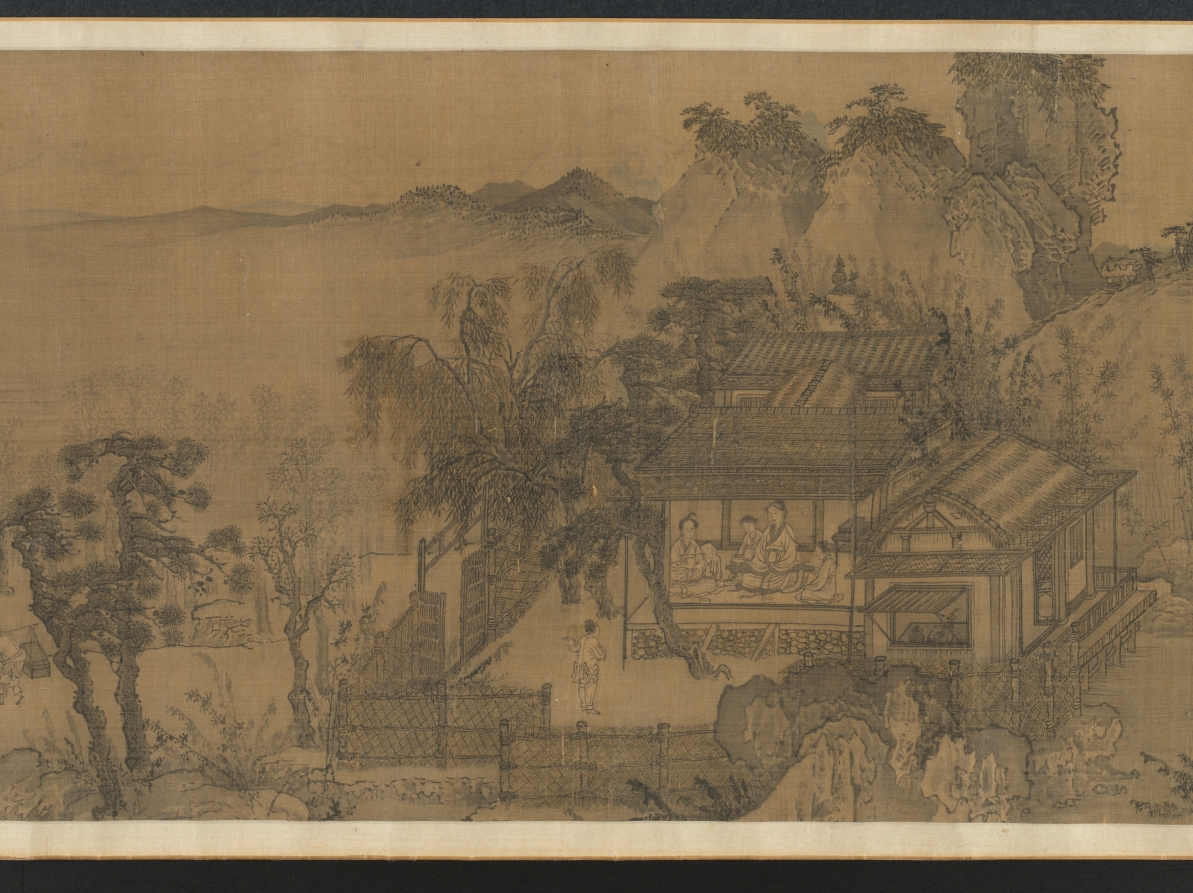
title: Tao Yuanming's Return Home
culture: China, Yuan dynasty (1271-1368)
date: 1300s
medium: Handscroll; ink and slight color on silk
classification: Painting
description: Tao Yuanming's revered poem "Return Home 歸去來辭 (Gui qu lai ci)" powerfully conveys his desire to leave bureaucratic life for the simplicity and authenticity of nature. This sentiment has deeply resonated with generations of Chinese scholars, making it a popular theme in paintings. This handscroll uses continuous narrative depicting Tao in multiple scenes from the poem. Starting on the right, the poet travels to his home. His children wait by the gate, while his wife pauses to tidy her hair before welcoming him. Then, free from the burdens of official service, Tao spends time in both nature and his cottage, where he can again enjoy wine, music, and books.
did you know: Poet Tao Yuanming 陶淵明 (c. 365–427 CE) returned to a secluded life instead of pursuing a civil service career.